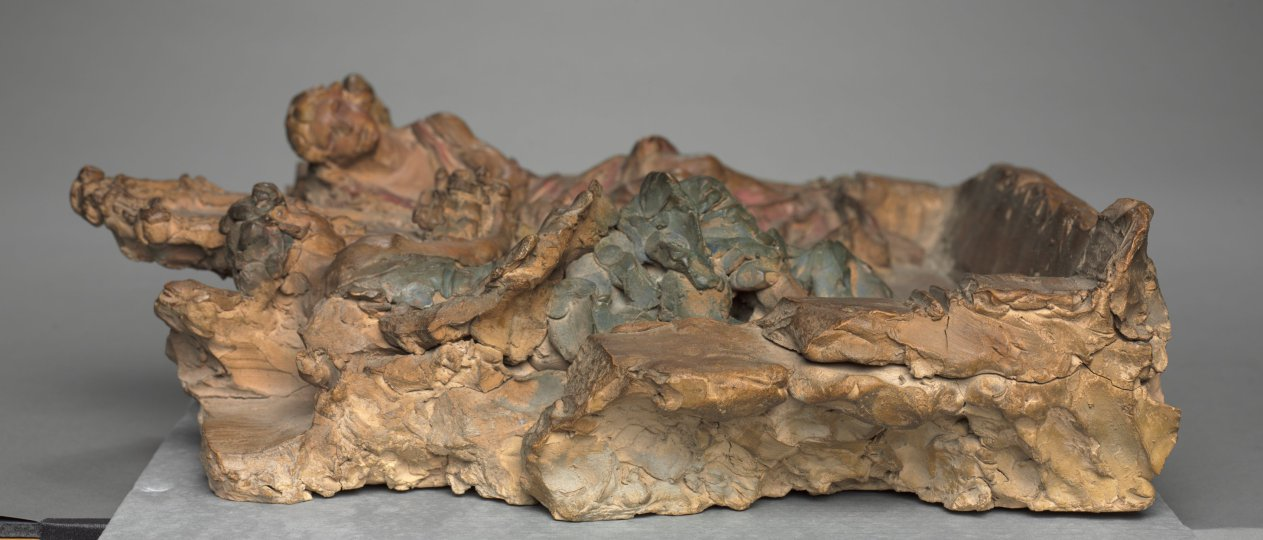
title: Two Angels and Cherubs Bearing an Icon of Christ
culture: Italy, Rome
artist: probably by Paolo Naldini (Italian, 1616–1691)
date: c. 1670–80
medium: terracotta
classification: Sculpture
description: This work is probably a study for a large altarpiece that would have combined several materials, including marble, stucco, and paint. The artist modeled his design in soft clay, which was then hardened by firing; subtle tints suggest the richness of the finished work. The idea of using sculptural figures to support a painted image within an altarpiece was influenced by the work of the Roman sculptor Gian Lorenzo Bernini (1598–1680), with whom Naldini is known to have worked.